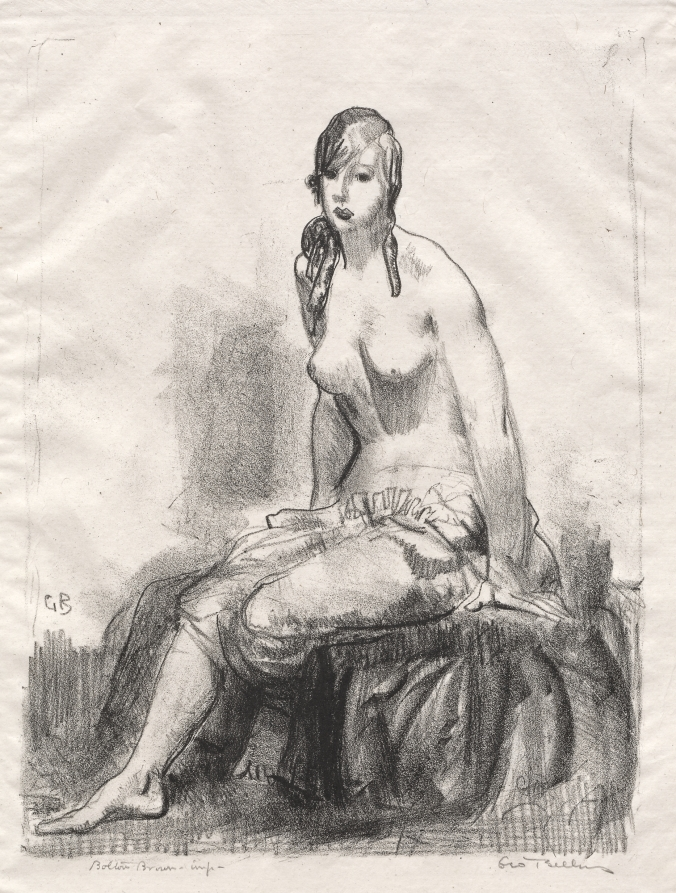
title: Morning, Nude Sketch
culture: America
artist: George Bellows (American, 1882–1925)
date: 1921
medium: lithograph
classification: Print